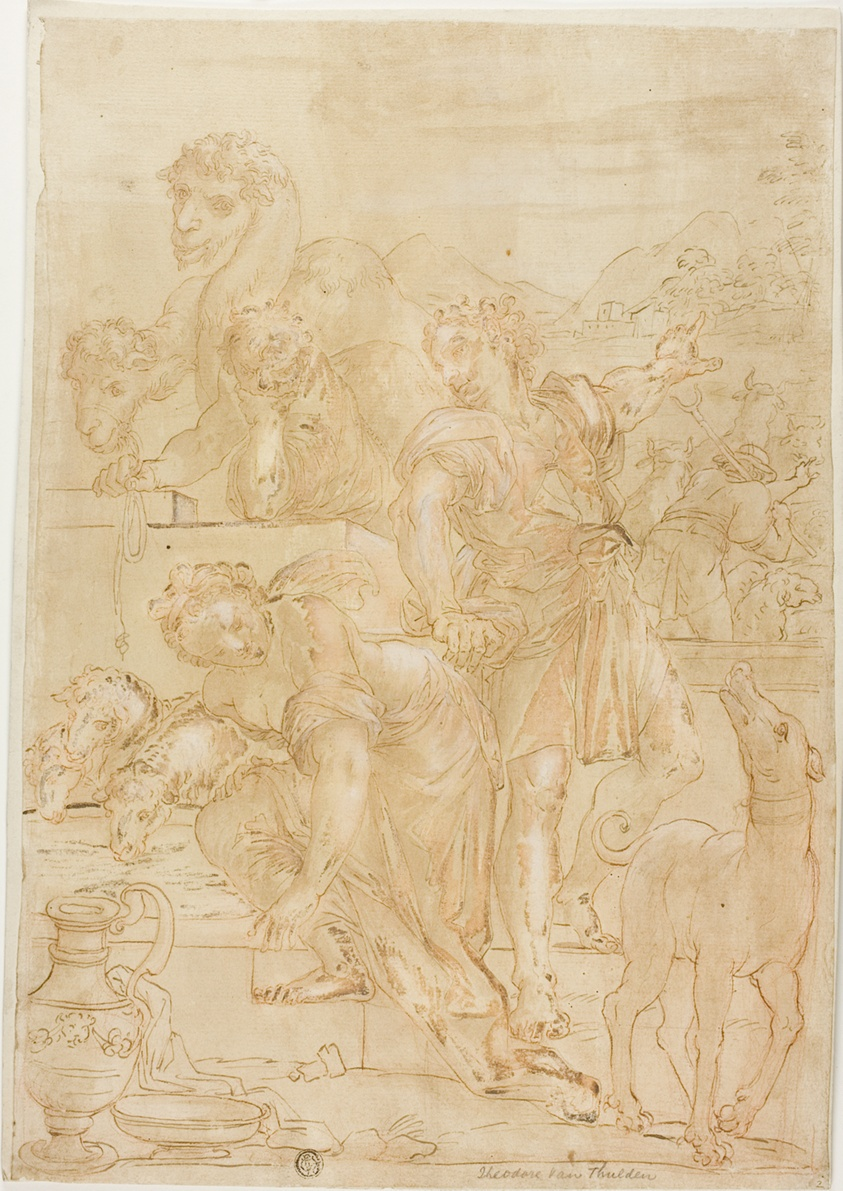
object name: Drawing and Watercolor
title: Isaac and Rebecca at Well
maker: Theodor van Thulden; Dutch, 1606-1669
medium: Pen and brown ink, with brush and brown wash and lead white (partly discolored), over red chalk, on cream laid paper, laid down on card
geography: Holland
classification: pen and ink drawings; drawings (visual works); prints and drawing